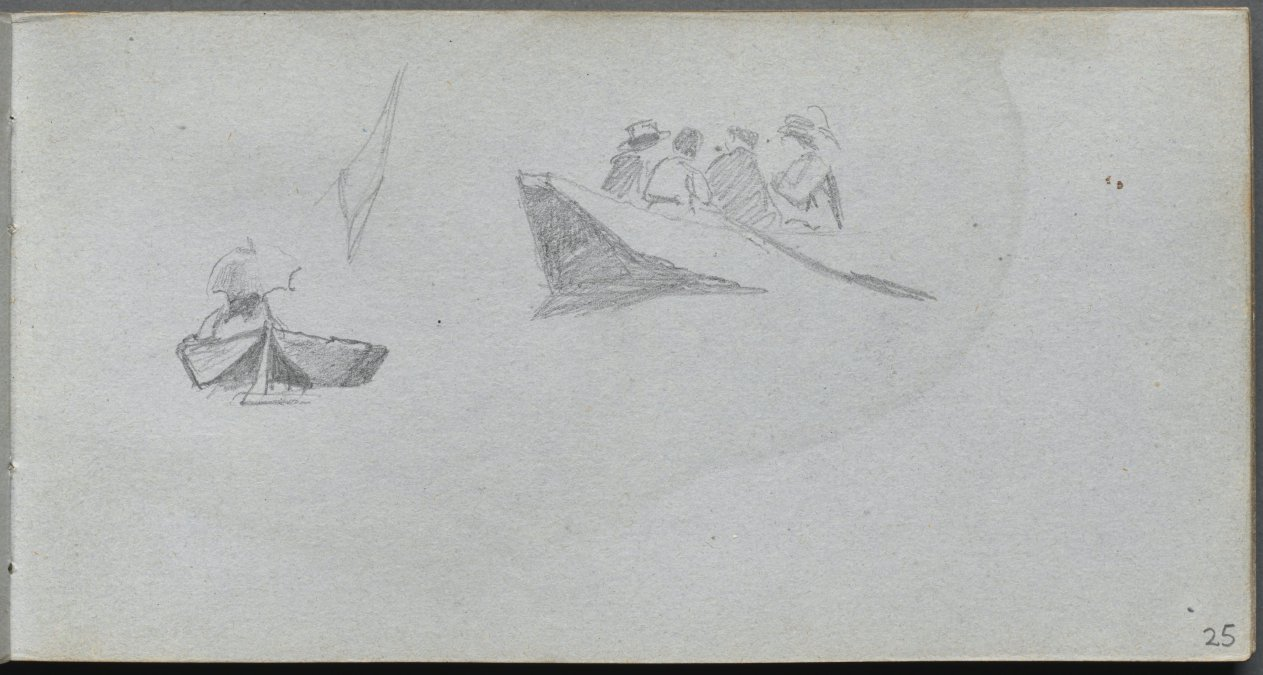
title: Sketchbook, page 25: Studies of Figures in Boats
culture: France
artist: Ernest Meissonier (French, 1815–1891)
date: c. 1860s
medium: graphite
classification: Bound Volume